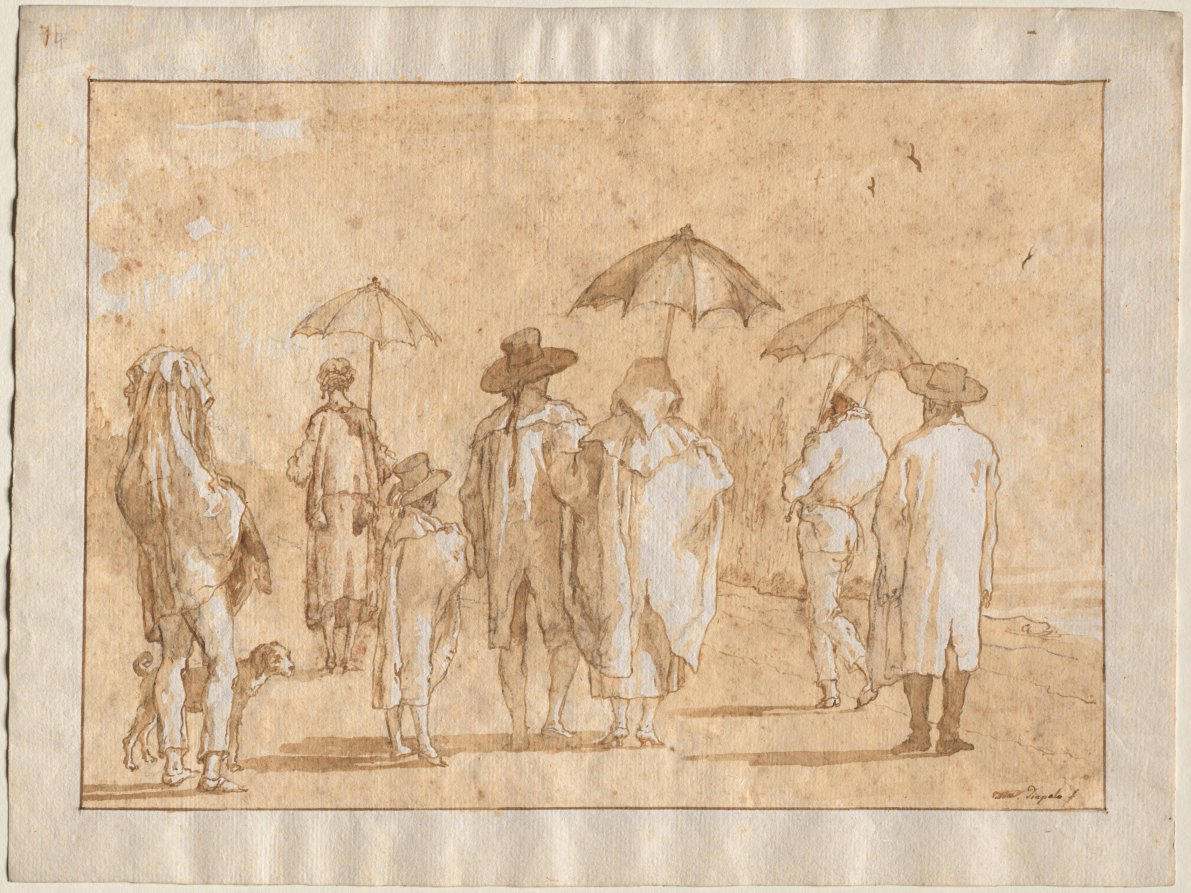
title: A Spring Shower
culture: Italy, Venice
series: Divertimento per li Regazzi (Entertainment for Children)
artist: Giovanni Domenico Tiepolo (Italian, 1727–1804)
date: 1797–1804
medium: pen and brown ink and brush and brown wash over black chalk; framing lines in brown ink over graphite on antique laid paper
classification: Drawing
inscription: signed, bottom right, in brown ink: Dom. Tiepolo f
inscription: upper left, in purple crayon: 74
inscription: verso, top right, in black chalk: 1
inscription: top right, in blue crayon: 7 [written over the "1"]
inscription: bottom right, in graphite: [Painting?] small of 4 figures only [upside down]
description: Giovanni Domenico Tiepolo, an important Venetian fresco painter of the 18th century, is best known today for his highly finished historical drawings that ingeniously incorporate details from daily life. In his series of 104 drawings known as Divertimento per li Regazzi (Entertainment for Children), he featured the Punchinello character from the Italian tradition of popular theater, a picaresque clown figure with a hooked nose, hunched back, and bloated belly. The character appears repeatedly in Tiepolo's sprawling narrative that rehearses the social mores of late 18th-century Venice through genre scenes of daily life, comic misadventures, and pathetic tragedies. In this enigmatic scene, one of nine sheets from the Divertimento at the CMA, the artist depicted a group of seven figures from the back as they wander aimlessly amid a shower that literally drips down the white paper. Domenico's characteristically tremulous lines and broad, simple washes of brown ink, laid down over an initial sketch in black chalk, capture a fresh and misty atmospheric effect that magnifies the pensive quality of the scene. The artist made this and other drawings from the series as finished works without correlations in other media.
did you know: Giovanni Domenico Tiepolo, who often depicted multiple Punchinellos (a clown figure) in his drawings, added two in this scene—the figure on the left with a cloak comically draped over his head, and another on the right holding an umbrella.